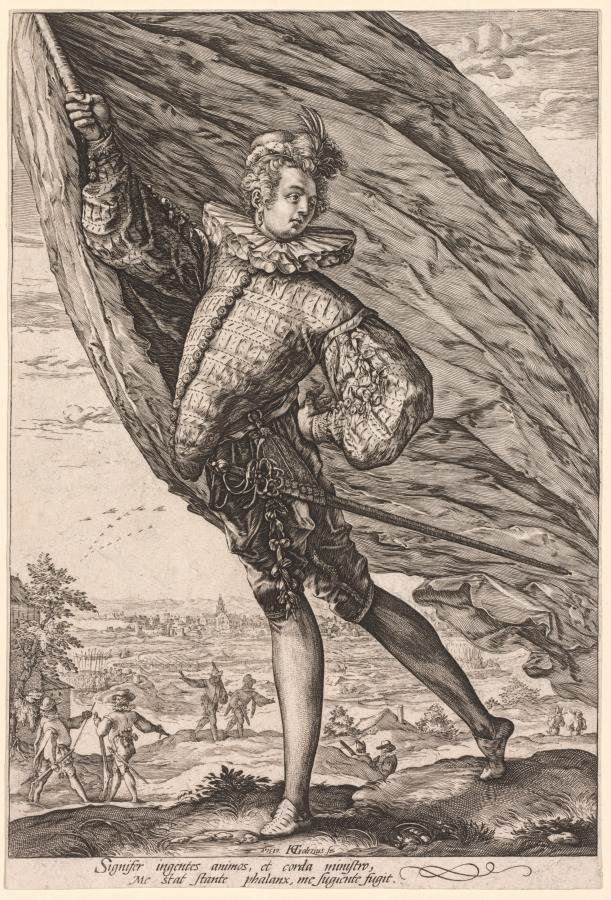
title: The Standard Bearer, Turned to Left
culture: Netherlands, 16th century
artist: Hendrick Goltzius (Dutch, 1558–1617)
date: 1587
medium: engraving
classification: Print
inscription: lower center, in plate: A°1587. HG[in monogram]oltzius.fe. ; across bottom, in plate: Signifer ingentes animos, et corda ministro, / Me stat stante phalanx, me [f?]ugiente fugit. ; VERSO, by Lisa or Leonard Baskin, lower center, in pen and black ink: Lisa & Leonard Baskin / 1967. ; lower left, in graphite: KA 524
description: Around 1587 Goltzius drew designs for 12 prints depicting officers and soldiers in landscape settings, which were engraved by his pupil Jacques de Gheyn II. Goltzius himself engraved a related pair of prints, The Captain of Infantry and The Great Standard Bearer. A central figure in the army and civic guard, the standard bearer marked the position of the captain. At this time, the Netherlands were trying to oust their Spanish rulers and these prints were conceived as flamboyant expressions of military pride.